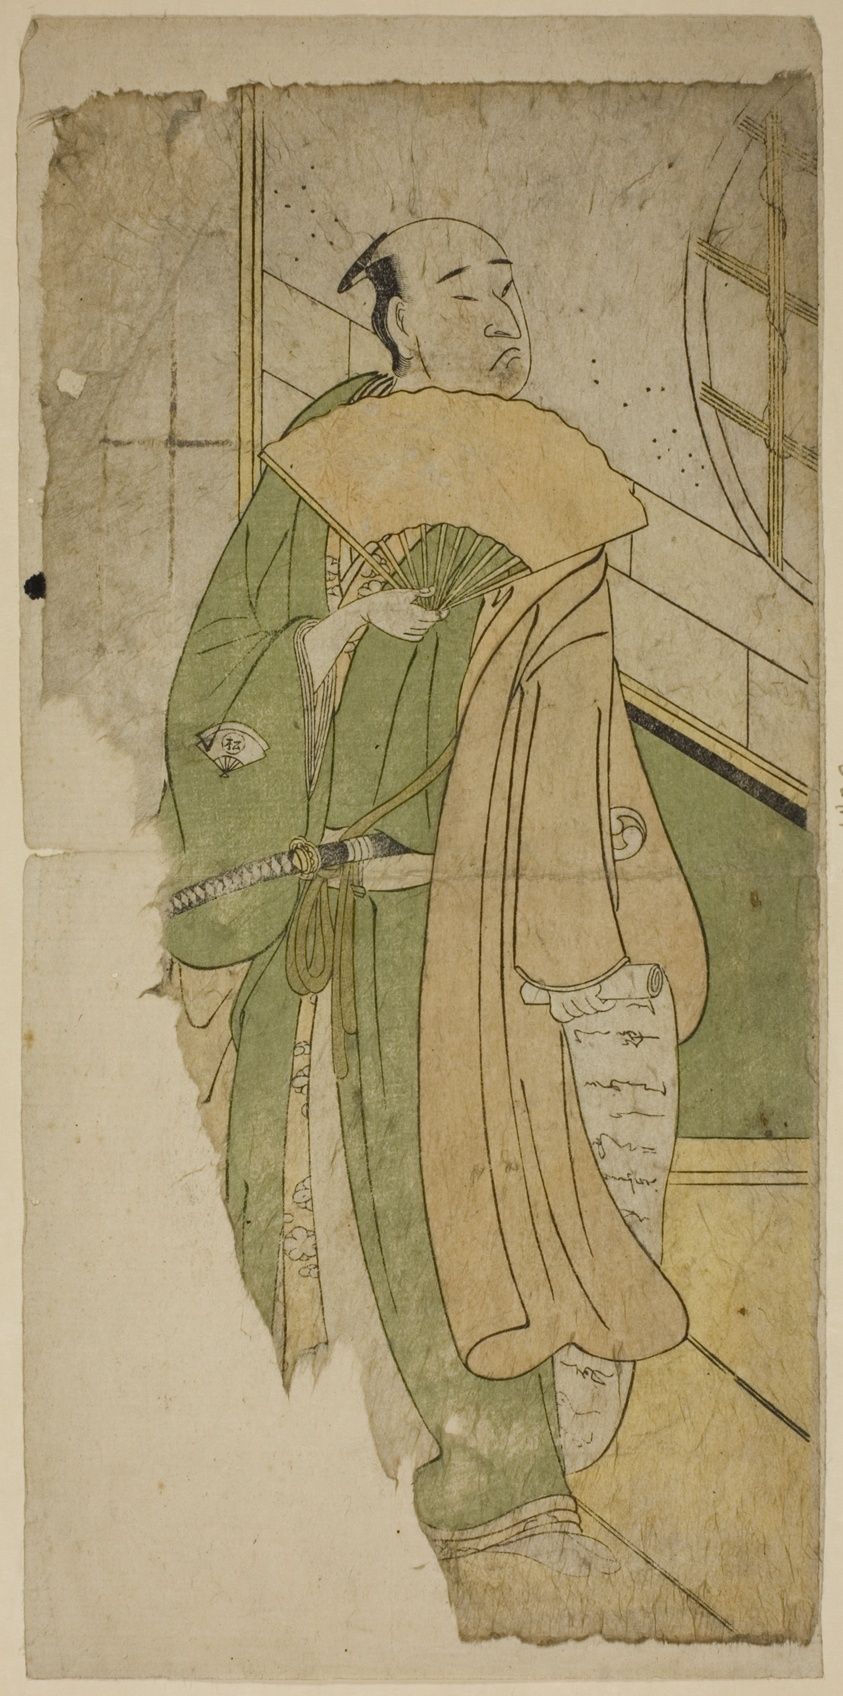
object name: Print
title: The Actor Onoe Matsusuke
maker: Katsukawa School; Japanese, c. 18th century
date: 18th century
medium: Color woodblock print; hosoban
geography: Japan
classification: woodblock print; print; asian art